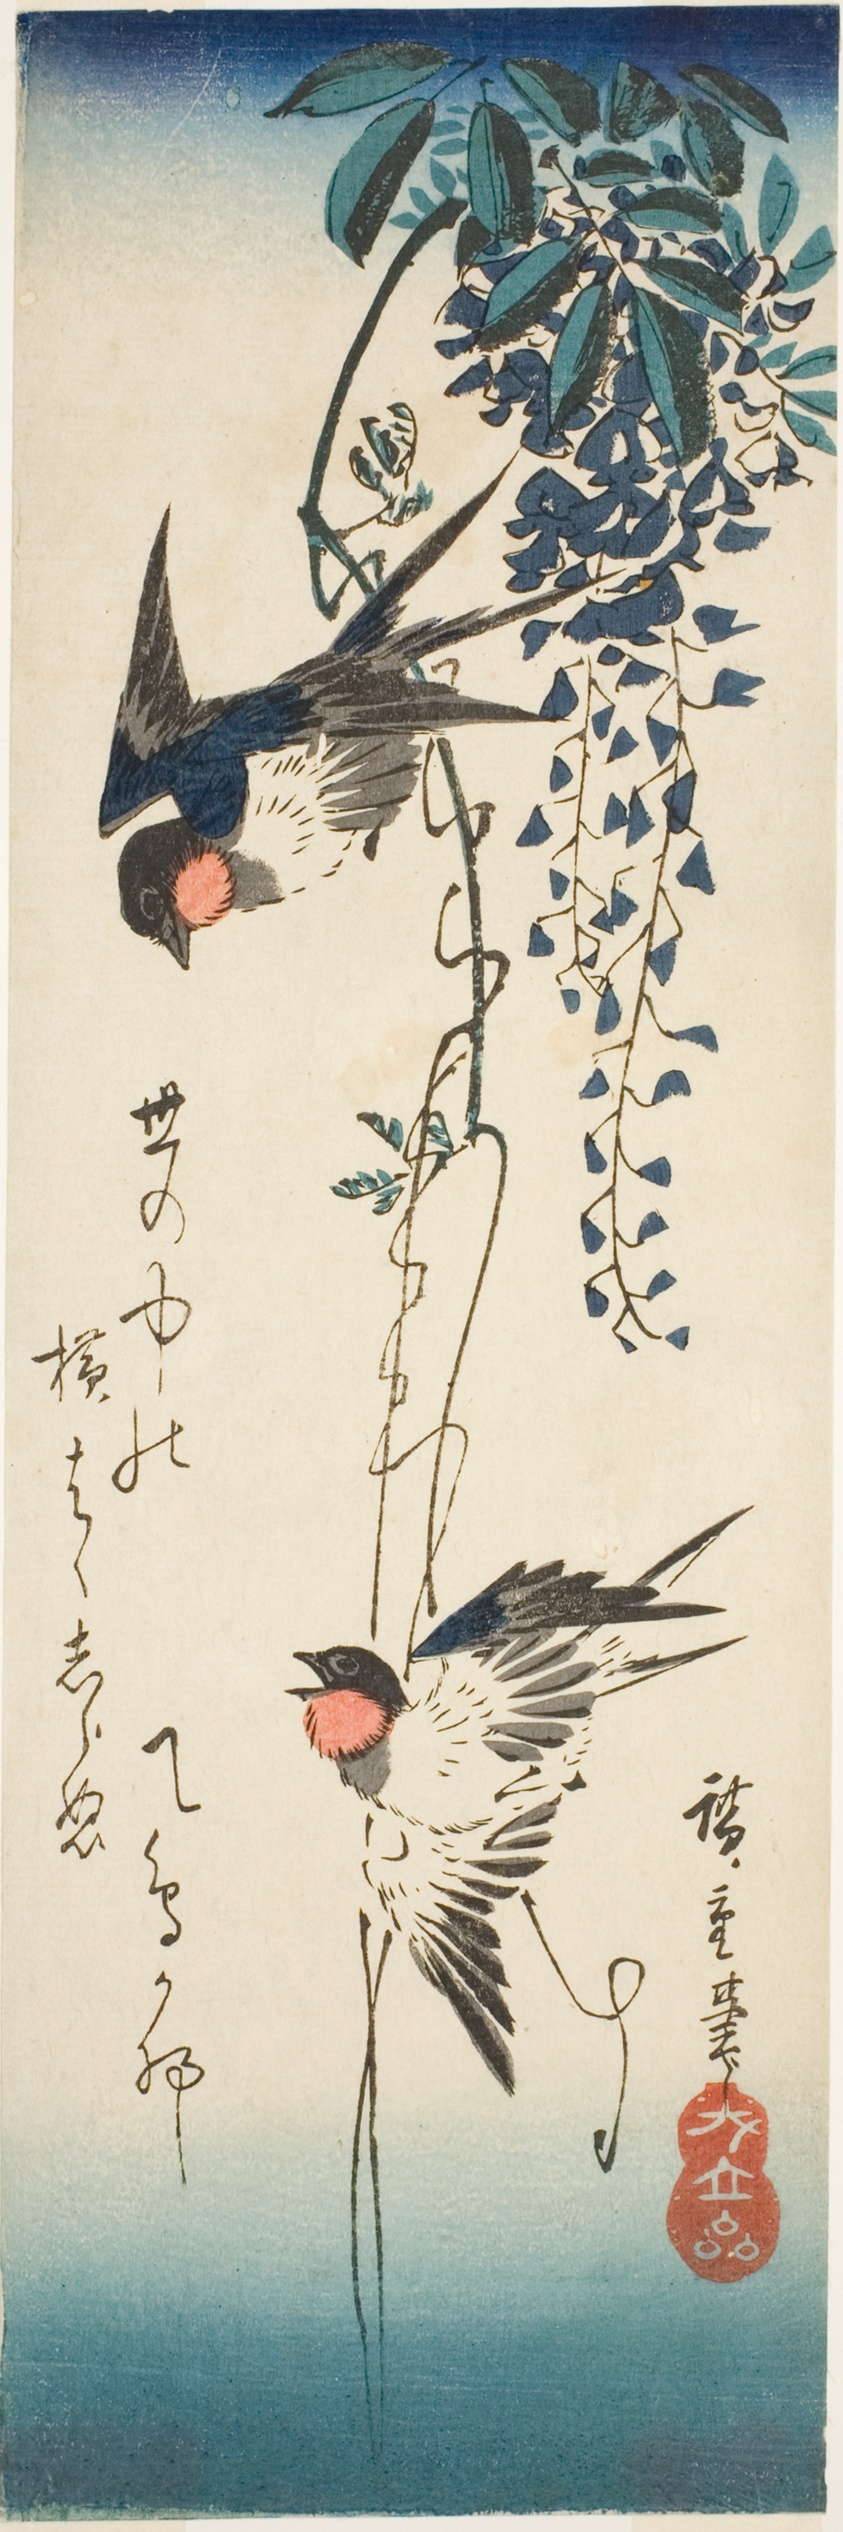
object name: Print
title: Swallows and wisteria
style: Japanese (culture or style)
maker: Utagawa Hiroshige 歌川 広重; Japanese, 1797-1858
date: 1840s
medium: Color woodblock print; aitanzaku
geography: Japan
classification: woodblock print; print; asian art